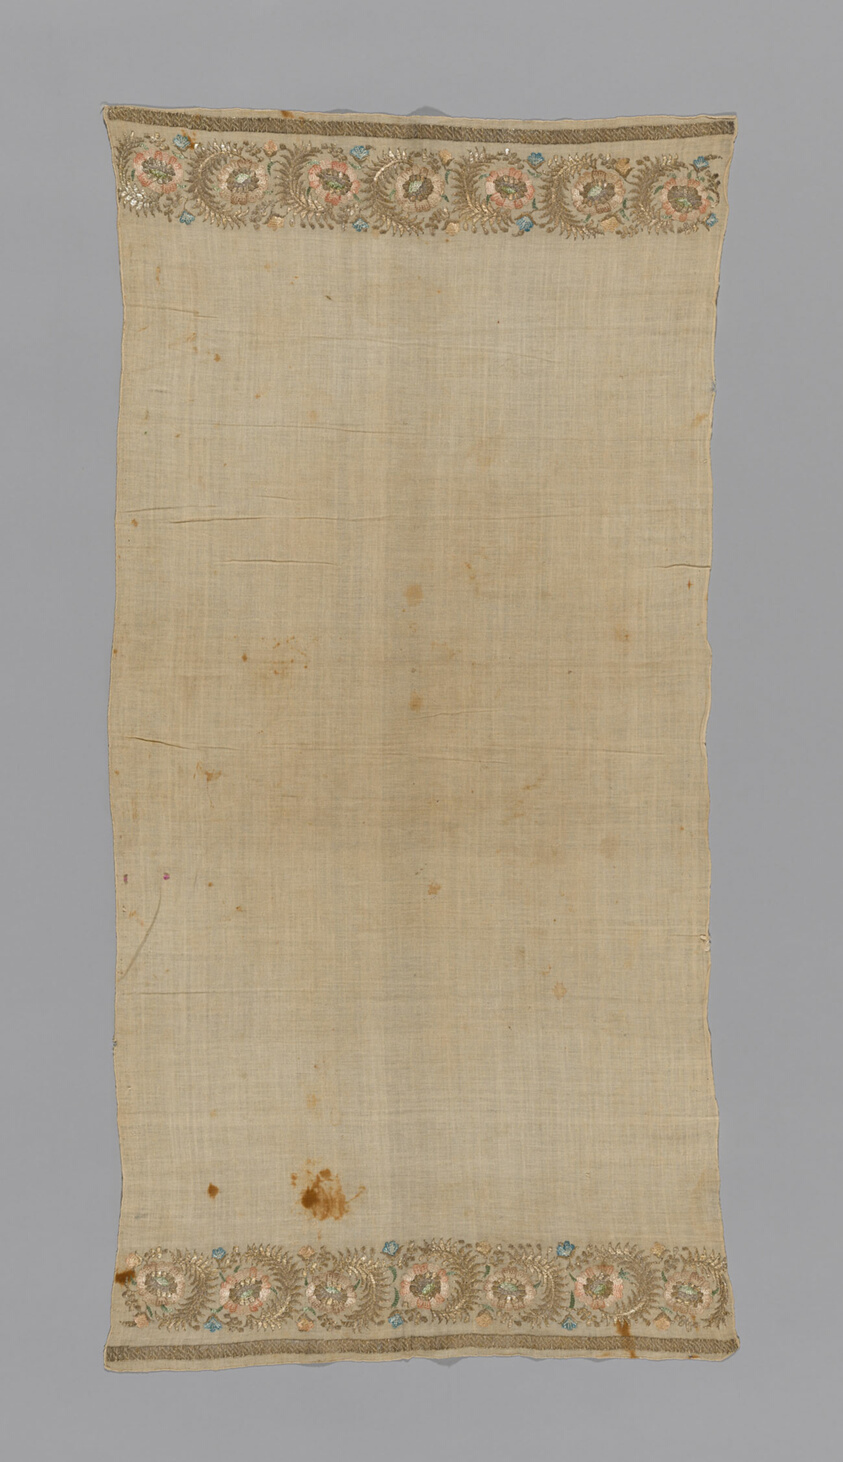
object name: Textile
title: Towel or Napkin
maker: Turkey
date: 19th century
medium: Embroidered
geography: Turkey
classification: textile; needlework (visual works); weaving